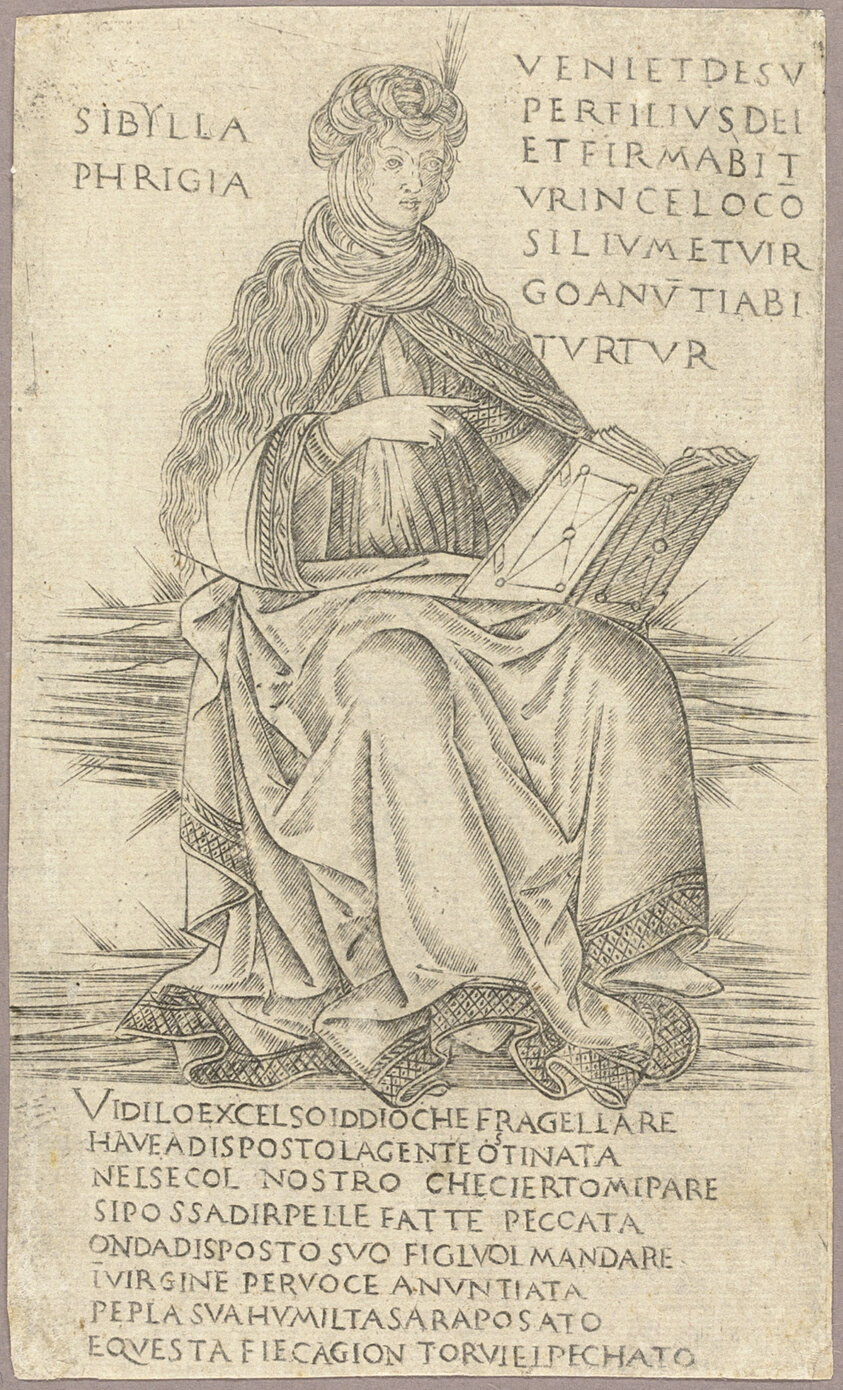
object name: Print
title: The Phrygian Sibyl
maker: Attributed to Francesco Rosselli; Italian, 1448-before 1513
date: 1480/90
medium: Engraving in gray on buff laid paper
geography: Italy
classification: engraving; print; prints and drawing